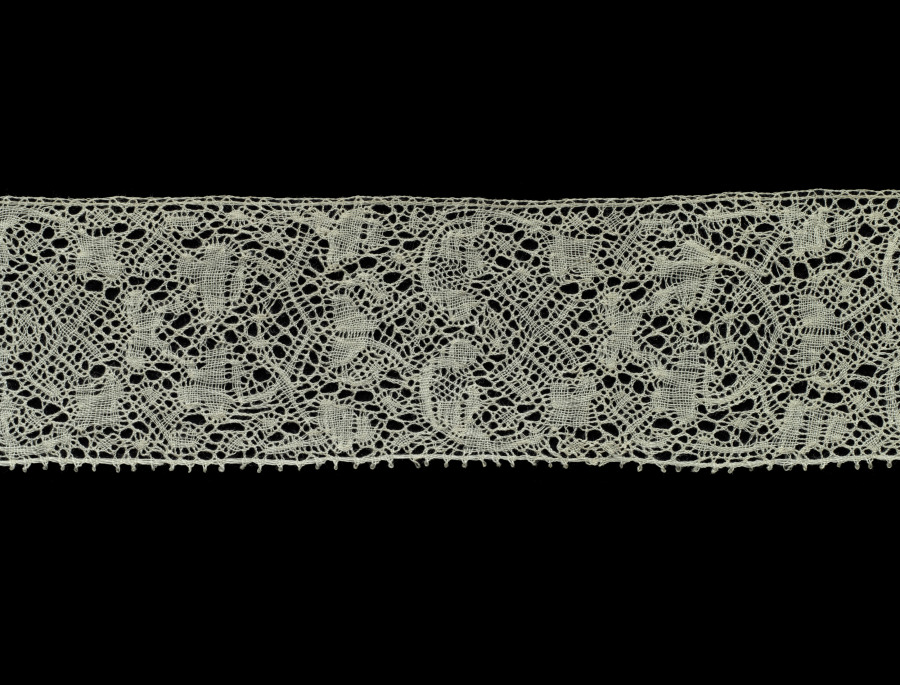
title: Lace Edging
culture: Belgium, Binche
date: 1900–1935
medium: Linen: bobbin lace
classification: Lace